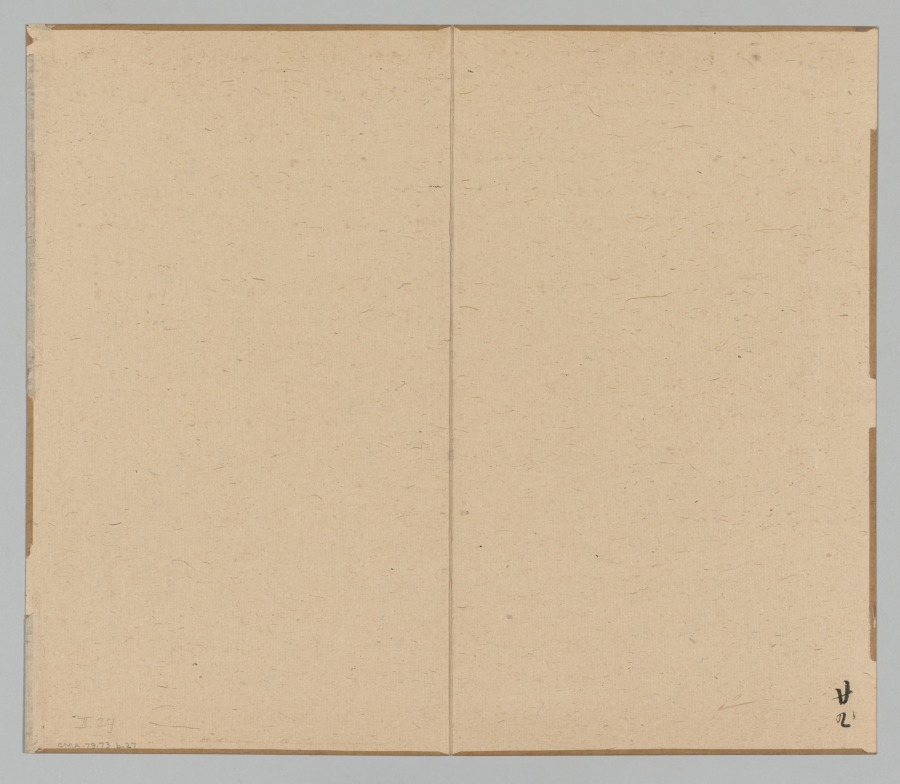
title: Reverberations of Taiga, Volume 2 (leaf 27)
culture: Japan, Edo period (1615–1868)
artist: Aoki Shukuya (Japanese, d. 1802)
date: mid- to late 1700s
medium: double-leaf from a pair of albums; ink and light color on paper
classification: Portfolio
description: Traditionally, young painters in Japan began their studies with an established master-painter. The master's compositions invariably became models that the apprentice copied to learn various ink and brush techniques. Shukuya was a pupil of the famous Kyoto artist Ikeno Taiga, whose style is reflected in these sketches of rocks, trees, and mountains.